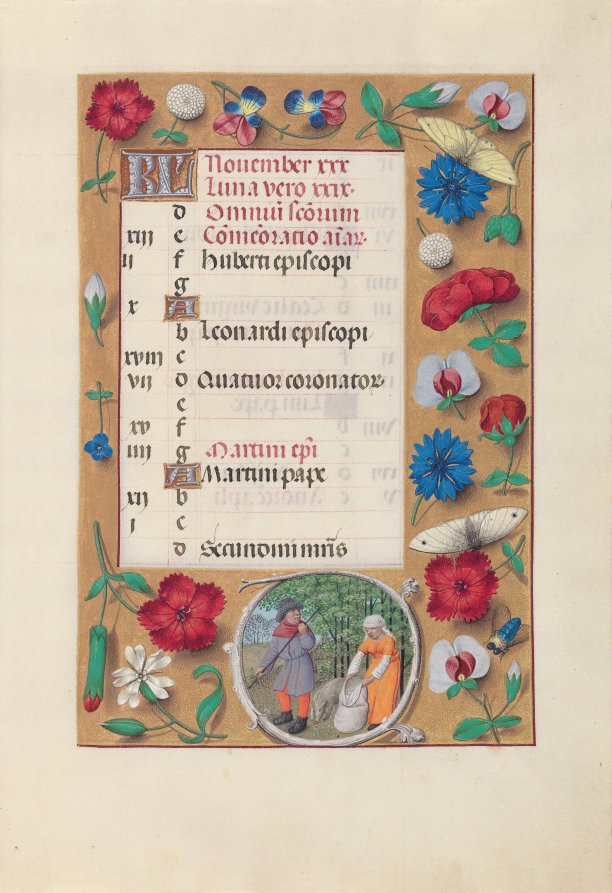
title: Hours of Queen Isabella the Catholic, Queen of Spain: Fol. 12r, November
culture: Flanders, Ghent and Bruges, late 15th century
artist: Master of the First Prayerbook of Maximillian (Flemish, c. 1444–1519)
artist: and Associates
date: c. 1500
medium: ink, tempera, and gold on vellum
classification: Bound Volume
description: This manuscript was illuminated by a circle of at least five highly organized manuscript painters active in the Flemish cities of Ghent and Bruges. The principal illuminator was Alexander Bening, who painted the majority of the book's miniatures. Manuscripts produced by this circle of artists are renowned for the decoration of their borders, which typically feature a rich variety of realistically-painted flowers, birds, and butterflies. This prayer book, called a book of hours, was intended not for a cleric, but for the private devotions of a lay person-in this case, Isabella the Catholic, Queen of Spain (1451-1504). Isabella's coat of arms embellishes the book's frontispiece. It is unlikely that the book was commissioned by the Queen herself; rather, she probably received it as a diplomatic gift from someone courting her patronage, perhaps Cardinal Francisco Jimenez de Cisneros. A Franciscan friar, Jimenez was dependent upon Isabella for his advancement, first to the post of Queen's confessor in 1492, and then to Archbishop of Toledo in 1495.